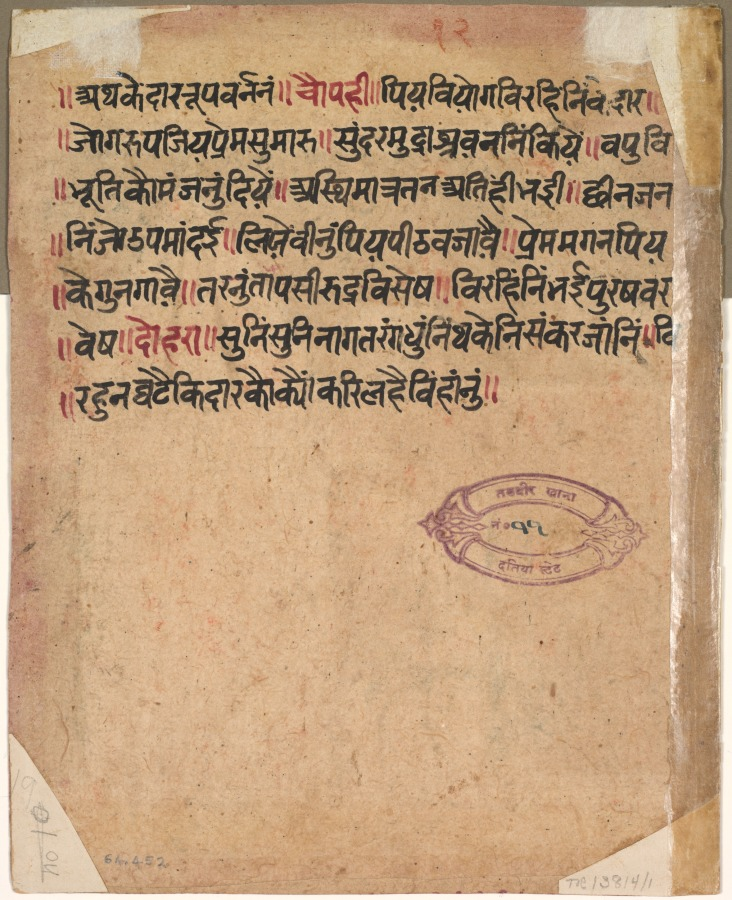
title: Kedara Ragini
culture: Central India, Rajasthan, Malwa school, 17th century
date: c. 1650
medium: ink and color on paper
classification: Painting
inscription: On reverse is seal of Datia state and seven-line inscription: "The heroine Kedara, longing for her lover, has assumed the character of a yogi and waits intently for his return. She has smeared ash all over her body, which is reduced to a skeleton. Absorbed in love, she sings her lord's praise. In this yogic garb, her body is terrifying and looks like a male body. She sees that night seems to be prolonged and anticipates dawn eagerly. Lovesickness is killing Kedara."1 (This translation is paraphrased from V. Dwivedi, 1968, p. 27; in his article, Dwivedi gives a longer translation in addition to contextual information.)